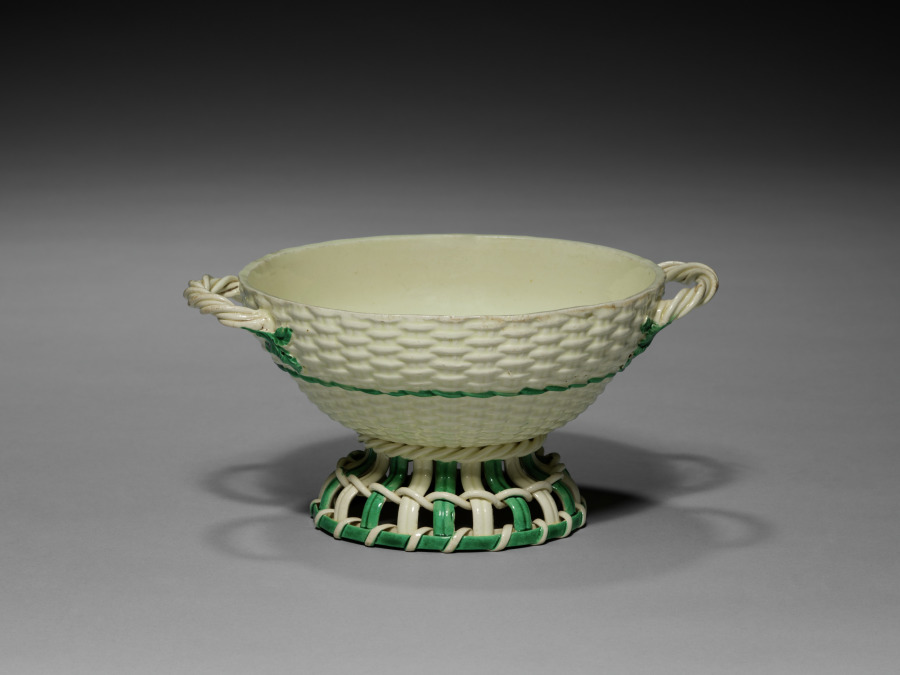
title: Wicker-Work Sauce Tureen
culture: England, 18th-19th century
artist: Wedgwood Factory (British)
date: c. 1780–1840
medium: earthenware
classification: Ceramic